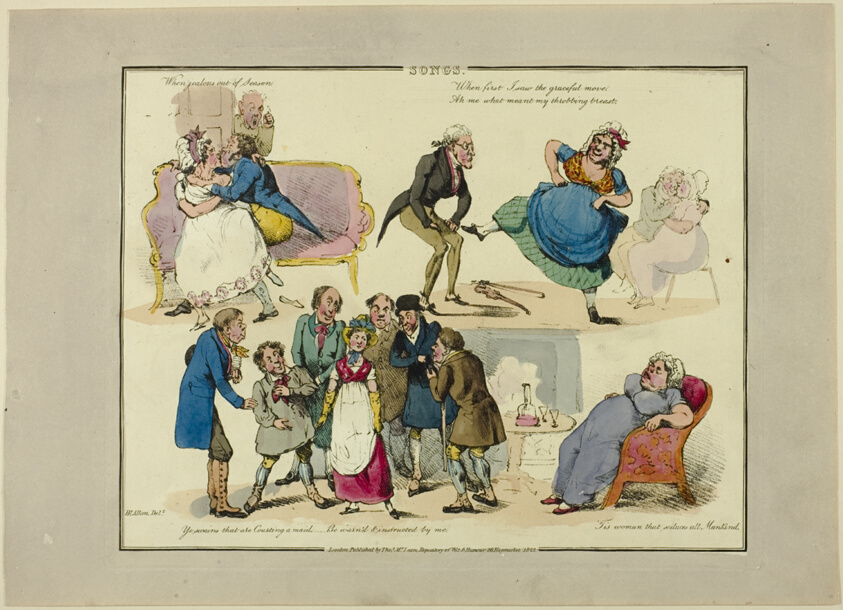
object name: Print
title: Plate from Illustrations to Popular Songs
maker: Henry Alken (English, 1785-1851); published by Thomas McLean (English, active 1790-1860)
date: 1822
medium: Soft ground etching with hand-coloring and aquatint on paper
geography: England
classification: etching; print; prints and drawing